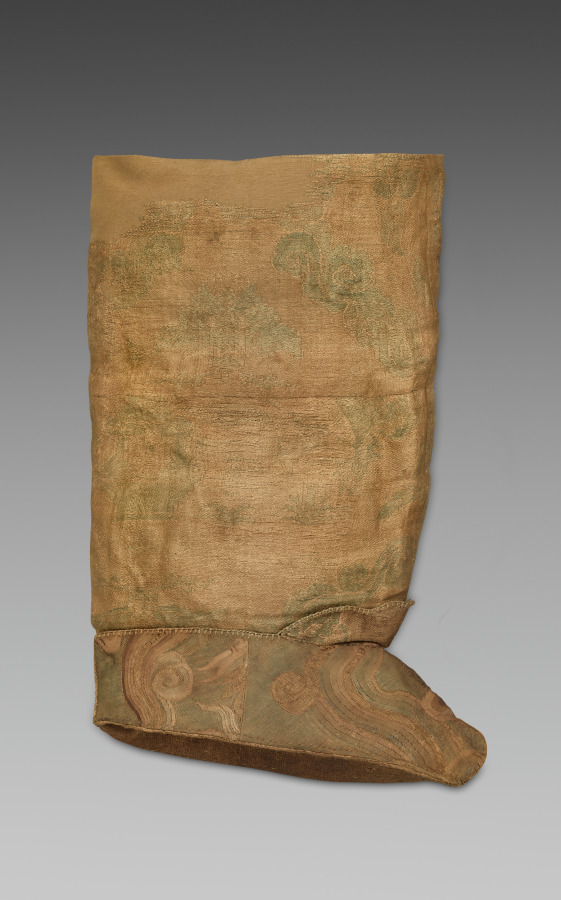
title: Pair of Boots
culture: China, Northern, Liao dynasty (907-1125)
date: 1000–1125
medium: Silk: compound twill; silk and gold: tapestry; silk: tabby, gauze, and batting; leather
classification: Garment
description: The fabric and tailoring of garments have always defined social status. For these boots, different outer fabrics were used: a patterned silk for the leg portion, and tapestry (kesi) for the foot. Since both were considered luxury fabrics, they were pieced together from remnants too precious to discard. Consequently, the silk pattern was not used in relation to the form of the boot, as seen in some other imperial boots. By contrast, these boots would have been made for a court official, not a member of the imperial family. The patterned silk was woven with geese flanking a vase of flowers on a stand and surrounded by cloud scrolls. The Chinese motif of flowers arranged in a vase was adopted by the Liao during the 11th century and indicates an 11th- or early 12th-century date for the boots.